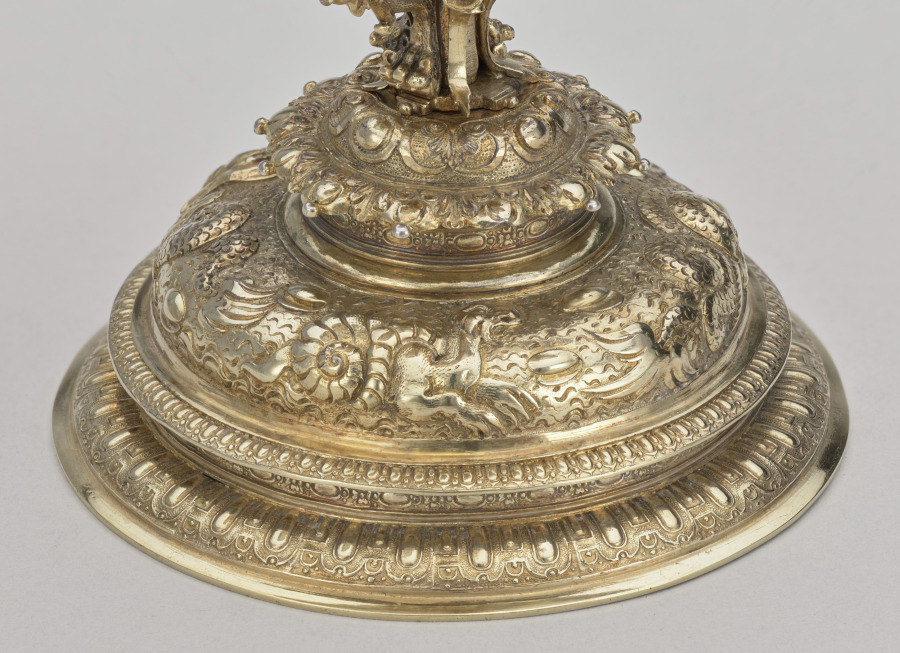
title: Nautilus Cup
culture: Netherlands, Holland, Delft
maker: Cornelis Jansz van der Burch (Dutch, active in Delft, d. 1615)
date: 1607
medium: Silver-gilt, nautilus shell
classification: Metalwork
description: Nautilus shells were brought to the Netherlands from Indonesia. Skilled Dutch silversmiths mounted them in silver, creating luxurious vessels that were sought after by wealthy collectors. Early Dutch nautilus cups are mainly associated with the city of Delft, although only a few other examples made in Delft are known from the late sixteenth and early seventeenth centuries. They feature the dramatic motif of a sea monster’s head.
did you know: The nautilus is a marine mollusk that swims by expelling water from its shell using jet propulsion.